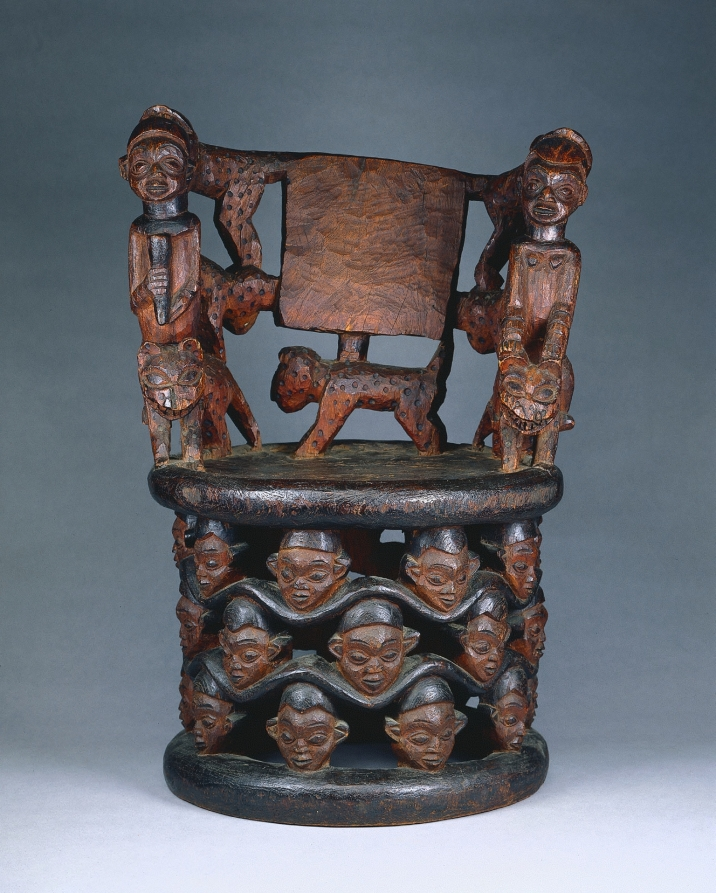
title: Prestige Chair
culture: Africa, Central Africa, Cameroon, Babanki-style maker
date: 1800s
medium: Wood and paint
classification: Furniture and woodwork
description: This stately chair attributed to the Babanki peoples of the Cameroon Grassfields features an unusual configuration of male and female figures. They are mounted on stylized leopards, animals revered as embodiments of power and royalty, which stand atop a base of three undulating rings bearing 24 heads. Chairs like this one serve as visual records that help mark kingships through the ages, conveying power and authority. The chair type was relatively common at the time; they were carved for sale to Europeans and local patrons, and also used as articles of royal gift exchange.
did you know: A British soldier acquired this work in Cameroon during the First World War.